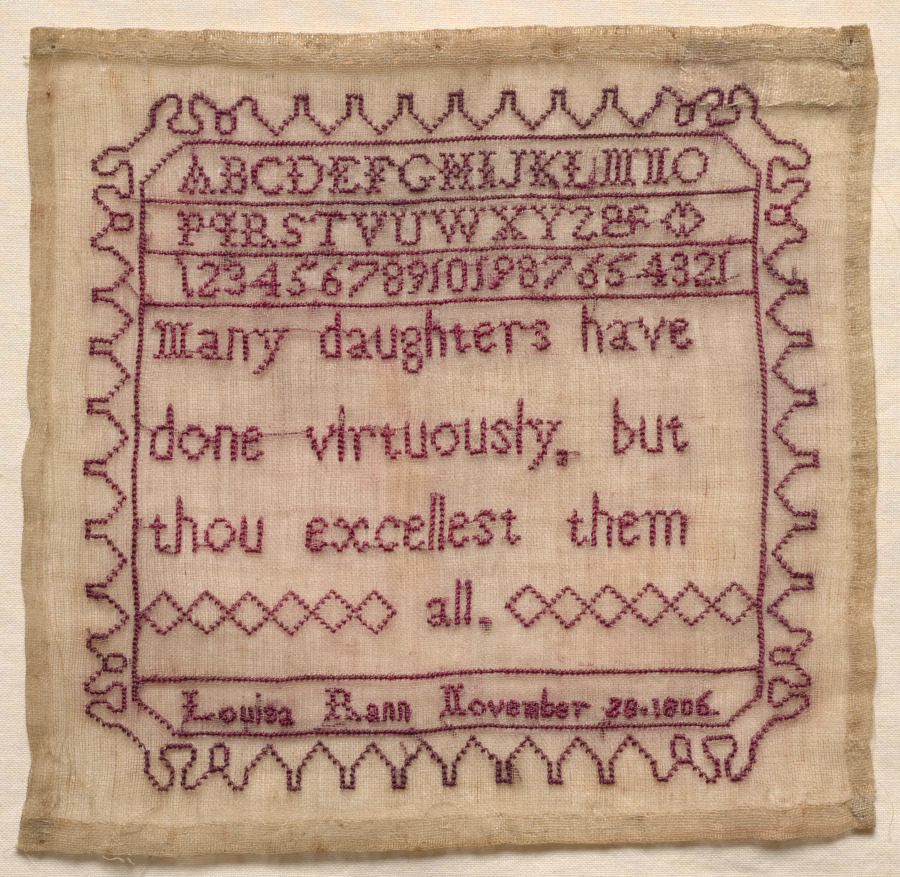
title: Sampler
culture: America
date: 1806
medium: embroidery; silk on linen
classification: Sampler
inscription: alphabet and numerals to ten (and reversed) at top. Underneath: "Many daughters have/ done virtuously, but/ thou excellest them/ all." Signed: Louisa Rann November, 1806.